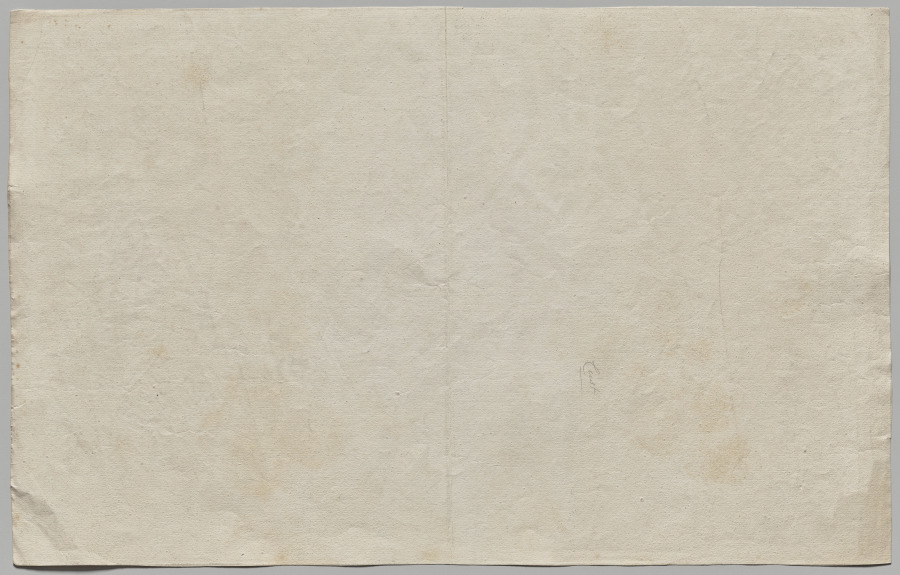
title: Nuova pianta di Roma data in luce da Giambattista Nolli l’anno MDCCXLVII, known as La Pianta Grande di Roma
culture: Italy, 18th century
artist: Giovanni Battista Nolli (Italian, 1701–1756)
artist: Carlo Nolli (Italian, 1690–1790)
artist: Rocco Pozzi (Italian, 1701–1774)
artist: Pietro Campana de Soriano (Italian, 1725–c. 1779)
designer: Stefano Pozzi (Italian, 1699–1768)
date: 1748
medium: etching and engraving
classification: Print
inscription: Written in pencil on verso: "[illegible]"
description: The monumental Pianta Grande di Roma, or Large Plan of Rome, which measures about 5 x 7 feet when its twelve plates are assembled, is a landmark in both cartography and printmaking. The map is considered the first scientific rendering of Rome, establishing new standards of accuracy and thoroughness when it was published in 1748. Devised by the Lombard architect and surveyor Giovanni Battista Nolli (Italian, 1701-56), the creation of the map required over ten years of surveying the city carried out by Nolli and a team of assistants with the help of new measuring devices. In Nolli’s “ichnographic” (also called “ground”) plan, architectural features and the urban infrastructure are reduced to a single horizontal slice, a minutely detailed footprint that conveys dimensions, proportions, and orientations to scale with the utmost clarity.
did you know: To make this map, Pope Clement XII granted the mapmaker permission to measure courtyards and other interior, inaccessible spaces in monastic communities, even those in nuns’ convents, which was controversial at the time.